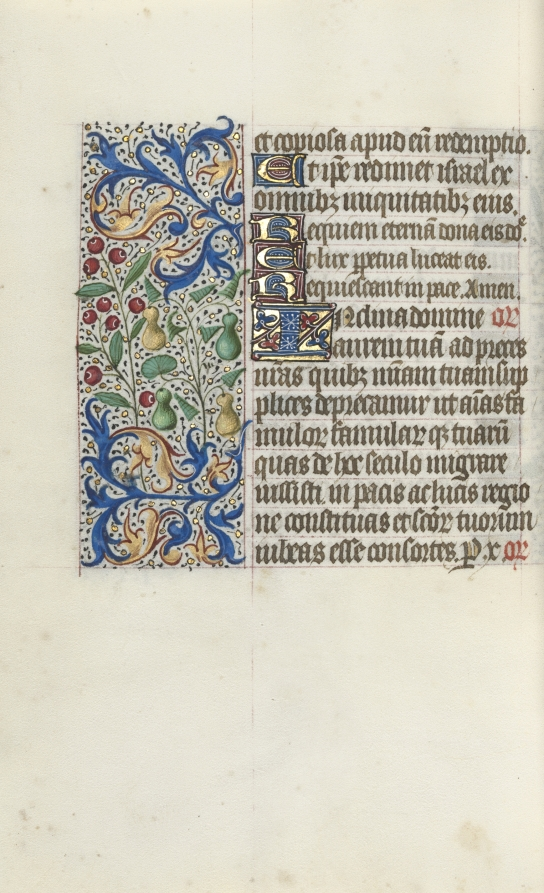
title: Book of Hours (Use of Rouen): fol. 145v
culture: France, Rouen, 15th century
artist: Master of the Geneva Latini (French, active Rouen, 1460–80)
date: c. 1470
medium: ink, tempera, and gold on vellum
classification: Bound Volume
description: In the late 1400s and early 1500s Rouen was an established and important center of book production. The city’s cathedral had a wealthy chapter that spent large sums of money to commission books and to maintain its extensive library. The stationers and booksellers would have likely been concentrated in or near the cathedral precinct. This artist, named after a manuscript now in Geneva, was Rouen’s principal illuminator during the second half of the 1400s.